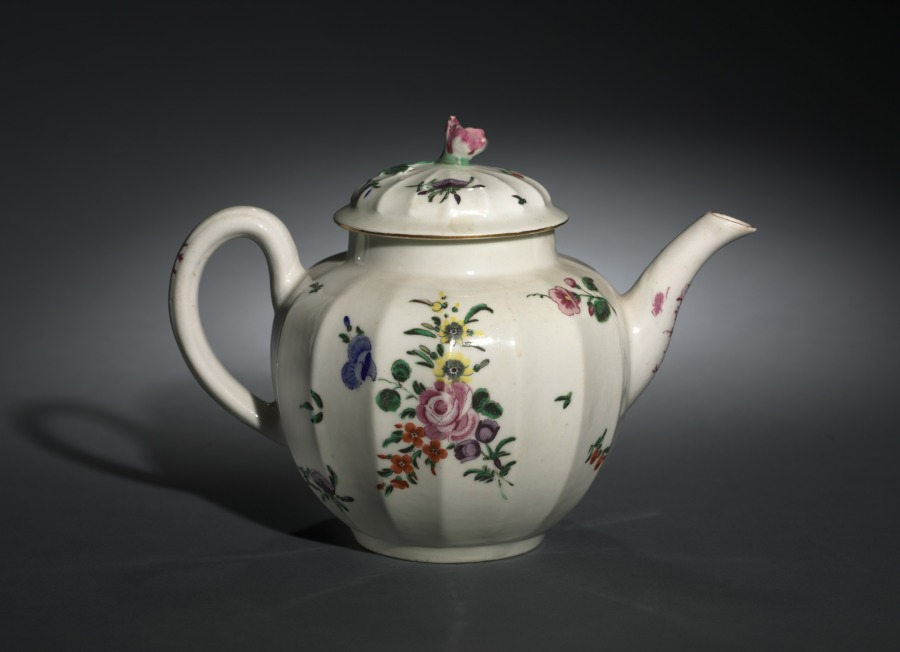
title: Teapot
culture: England, Worcester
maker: Worcester Porcelain Factory (British, established 1751)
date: c. 1755–75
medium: porcelain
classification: Ceramic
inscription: Mark on the bottom - An X with radiating lines inside a box.